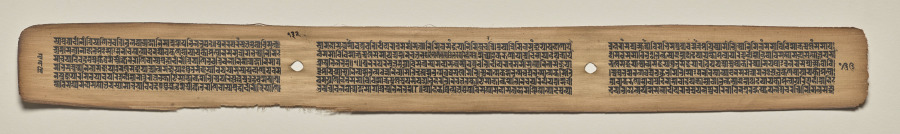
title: Text, Folio 132 (verso), from a Manuscript of the Perfection of Wisdom in Eight Thousand Lines (Ashtasahasrika Prajnaparamita-sutra)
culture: Eastern India, Bihar, Vikramashila Monastery. Painting: Nepal, Kathmandu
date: Sunday, September 14, 1119 (year 239 of the Newar Samvat in the month of Ashvina)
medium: gum tempera and ink on palm leaves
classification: Painting